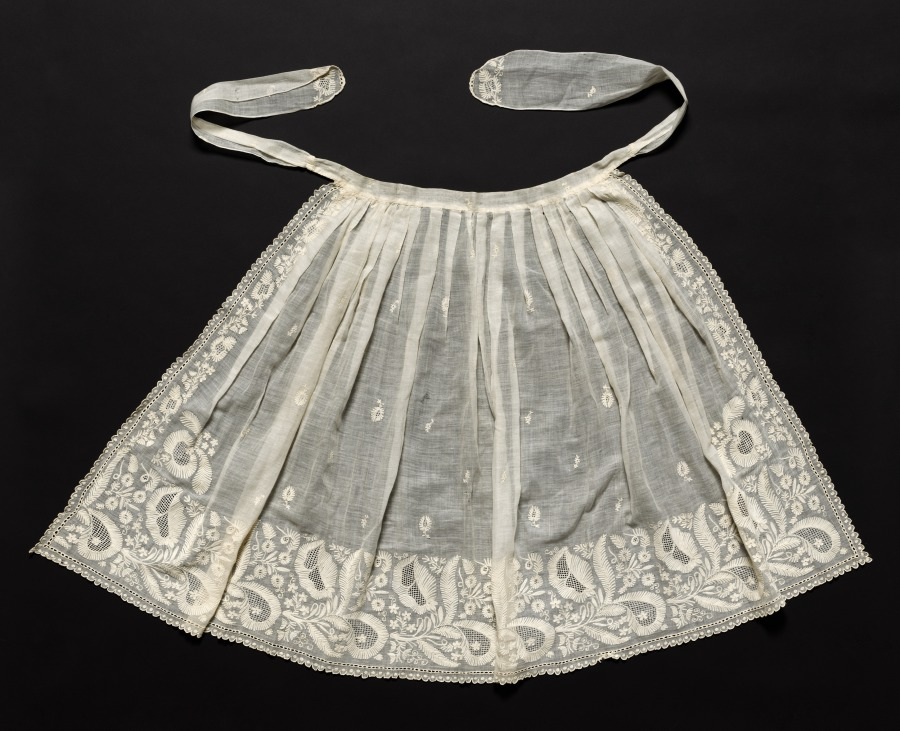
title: Wedding Apron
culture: Germany, Schwerin, Early 19th century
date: c. 1830s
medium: Plain weave cotton: needle lace (drawnwork) and embroidery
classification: Embroidery